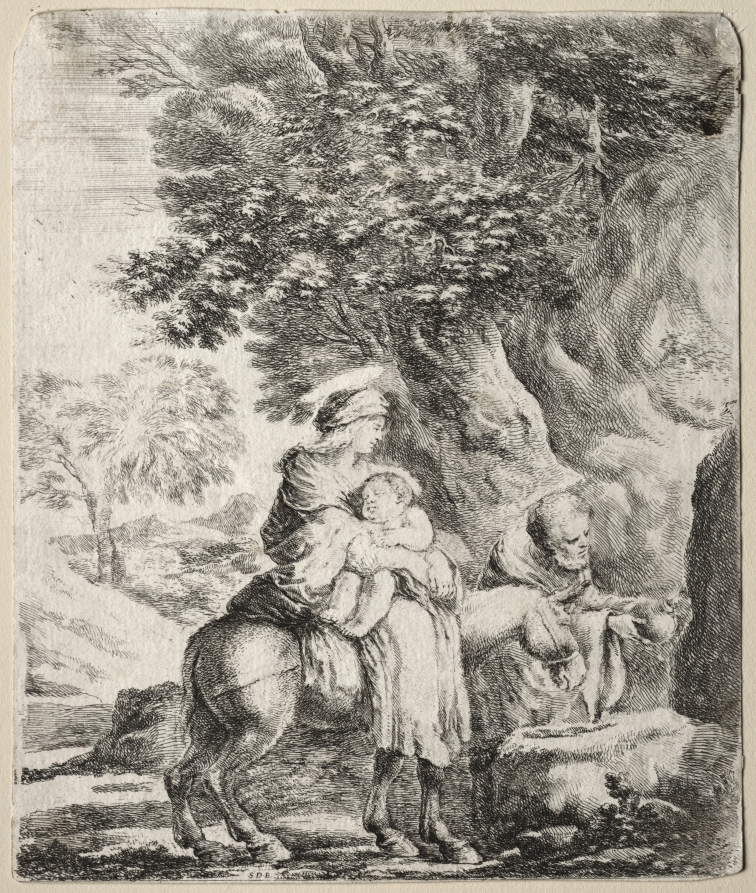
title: Flight into Egypt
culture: Italy, 17th century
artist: Stefano Della Bella (Italian, 1610–1664)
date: c. 1662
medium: etching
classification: Print